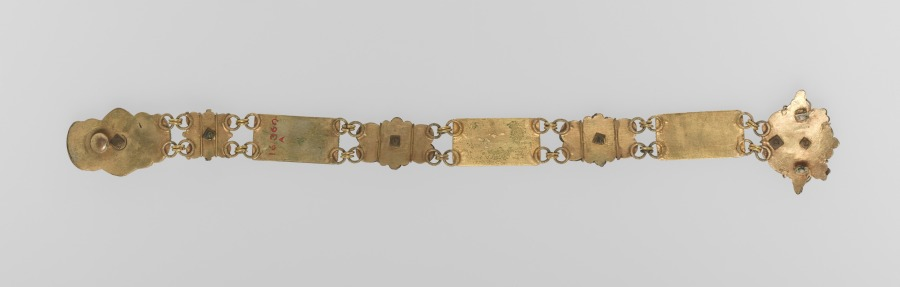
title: Belt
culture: Netherlands, early 18th century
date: 1700s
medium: enamel on copper with gilt metal mounts and cloisonné medallions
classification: Enamel